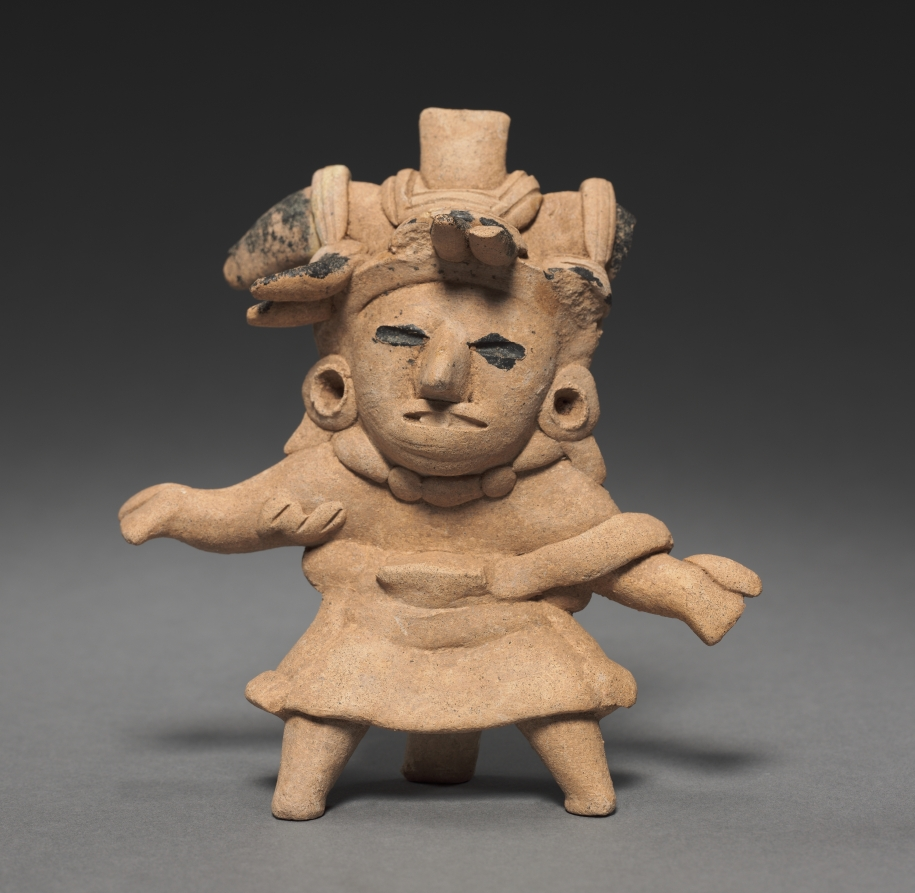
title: Tripod Whistle Figurine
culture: Mexico, Veracruz, Remojadas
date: c. 150–1 BCE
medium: earthenware with asphalt paint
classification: Sculpture